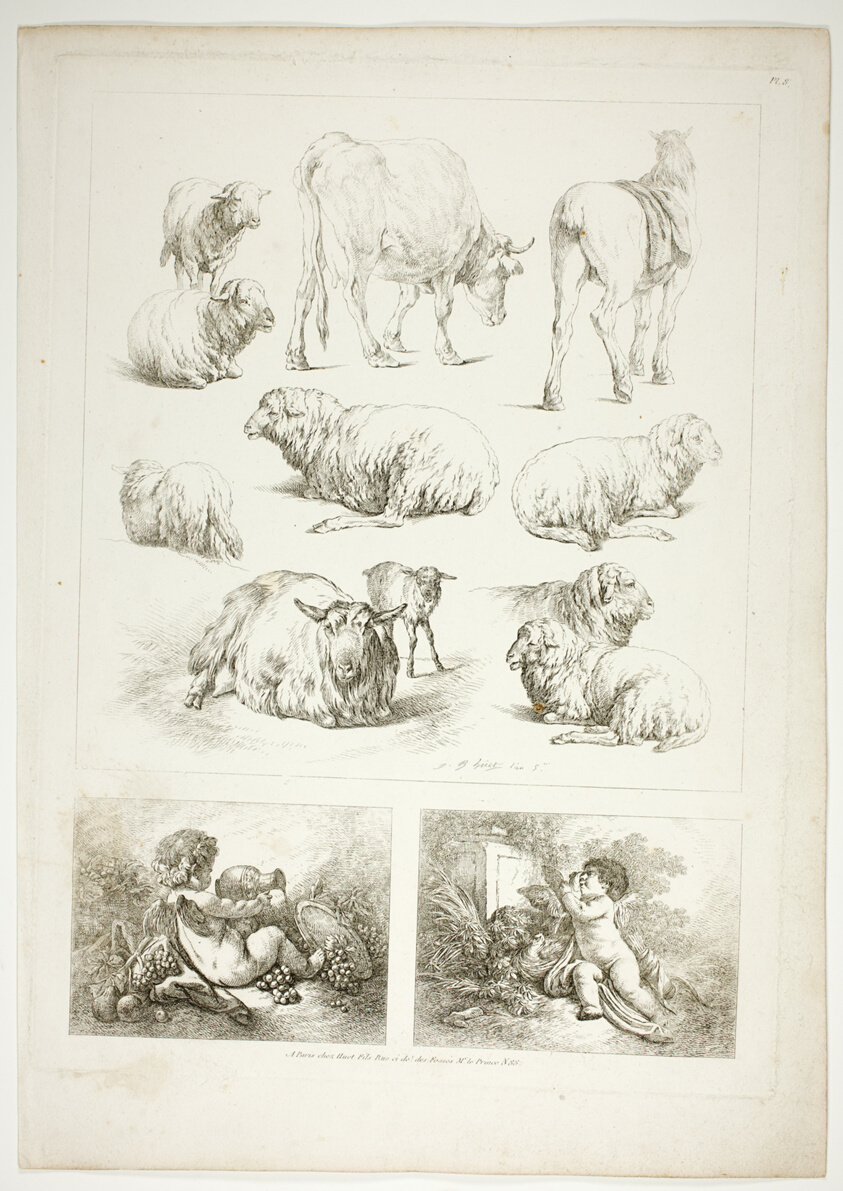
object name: Print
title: Plate Eight of 38 from Oeuvres de J. B. Huet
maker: Jean Baptiste Huet (French, 1745-1811)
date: 1796–99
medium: Etching on paper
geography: France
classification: etching; print; prints and drawing